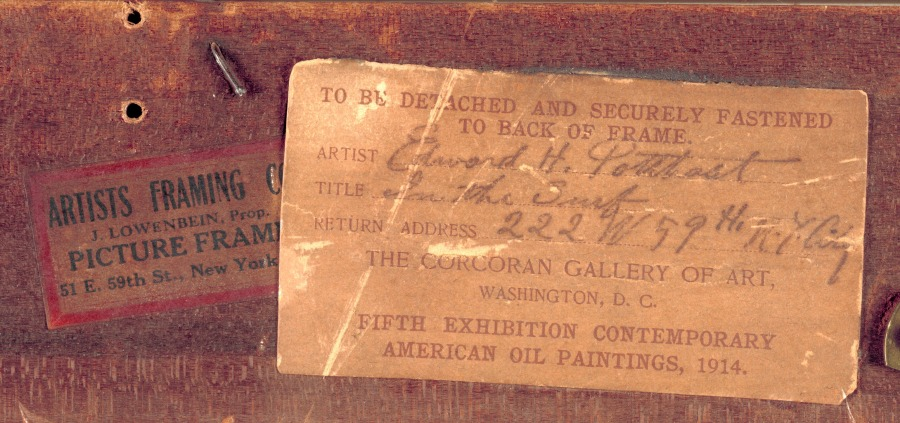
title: In the Surf (recto); Beach Study (verso)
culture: America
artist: Edward H. Potthast (American, 1857–1927)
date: c. 1910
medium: oil on panel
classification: Painting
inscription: recto bottom left: E Potthast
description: Born in Cincinnati, Potthast studied in Munich and Paris before returning to the United States, where he began spending summers along the coast of New England. There he studied the carefree seaside activities of bathers and picnickers. Although he never married, he was particularly fond of painting young mothers and their children.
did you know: During the early 1900s, modesty dictated women’s bathing suit designs featuring long, loose-fitting skirts.